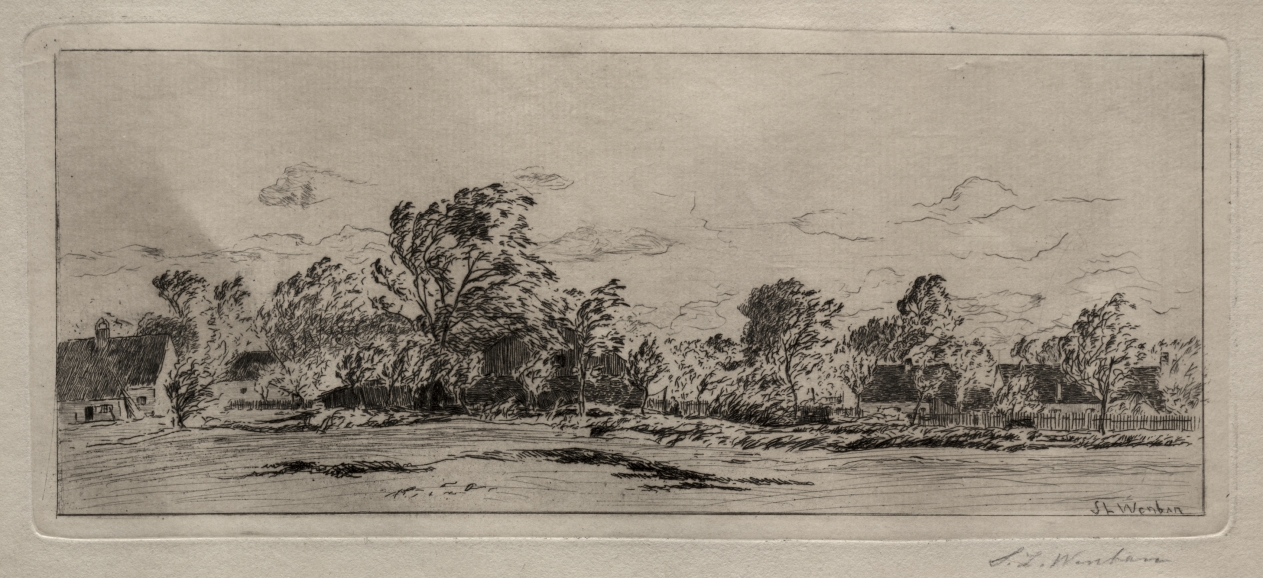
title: Windy Morning - Schleissheim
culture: America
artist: Sion Longley Wenban (American, 1848–1897)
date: c. 1880s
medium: etching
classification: Print